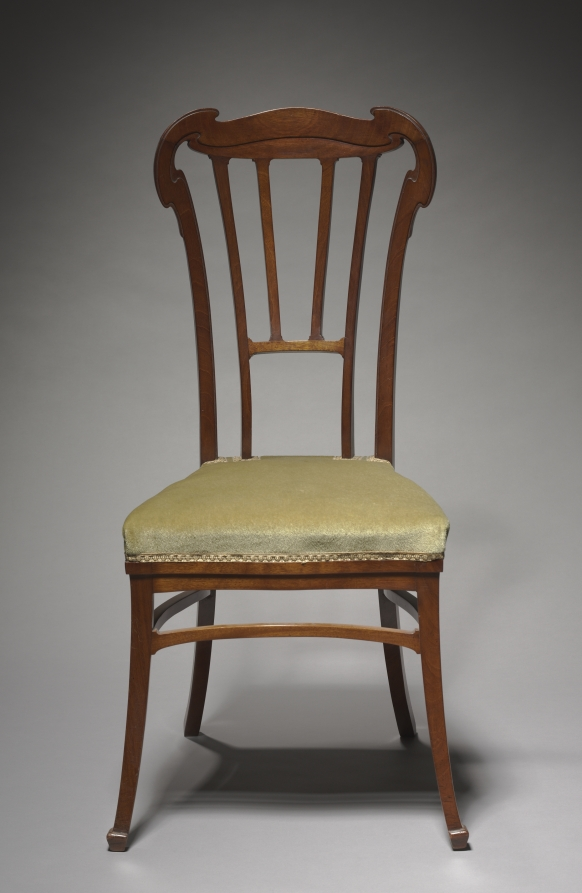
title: Chair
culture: Belgium, 20th century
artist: Victor Horta (Belgian, 1861–1947)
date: c. 1900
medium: mahogany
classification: Furniture and woodwork